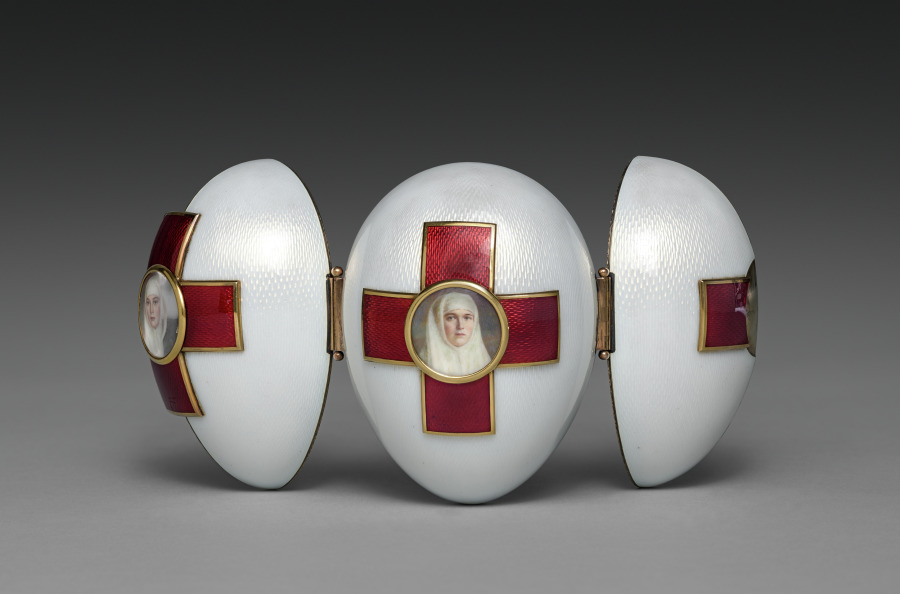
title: Imperial Red Cross Easter Egg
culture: Russia, St. Petersburg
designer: Peter Carl Fabergé (Russian, 1846–1920)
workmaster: Henrik Wigström (Russian, 1862–1923)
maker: House of Fabergé (Russian, 1842–1918)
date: 1915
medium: gold, silver gilt, enamel, glass, ivory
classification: Miscellaneous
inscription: inscribed on interior of egg: symbols for Alpha and Omega and imperial crown for Alexandra Feodorovna; 1915; inscriptions in Cyrillic, Old Church Slavonic, and Roman letters which identify Sts. Olga and Tatiana and presumably describe the central scene of the triptych.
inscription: Inscribed on silk velvet and satin lined case: double-headed eagle, Fabergé, Petersburg, Moscow, London (all in Cyrillic on lining of case); 17.559, abbreviation for "Red Cross" (in Cyrillic in red ink on outside of case).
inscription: Hallmarks: 72, Kokoshnik, lower case alpha in script [assay mark of St. Petersburg, 1908-26]; H.W. [initials of workmaster Henrik Wigström]; Fabergé (in Cyrillic).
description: The House of Fabergé made two imperial Easter eggs in 1915 that honored the contributions of Tsarina Alexandra and her two eldest daughters, Olga and Tatiana, to the war effort as Red Cross Sisters of Mercy. Compared to other Fabergé eggs elaborately ornamented with jewels, the eggs reflected the mood of austerity in Russia during World War I. This version becomes an icon when opened, revealing miniatures of the patron saints of the tsarina’s daughters. After the Russian Revolution, this relic of the Tsarist past was sold by the Soviet government to raise needed cash for the treasury.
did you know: This egg was confiscated by the Bolsheviks during the Russian Revolution and sold by the government of Josef Stalin in the 1930s to raise money for the Soviet treasury.